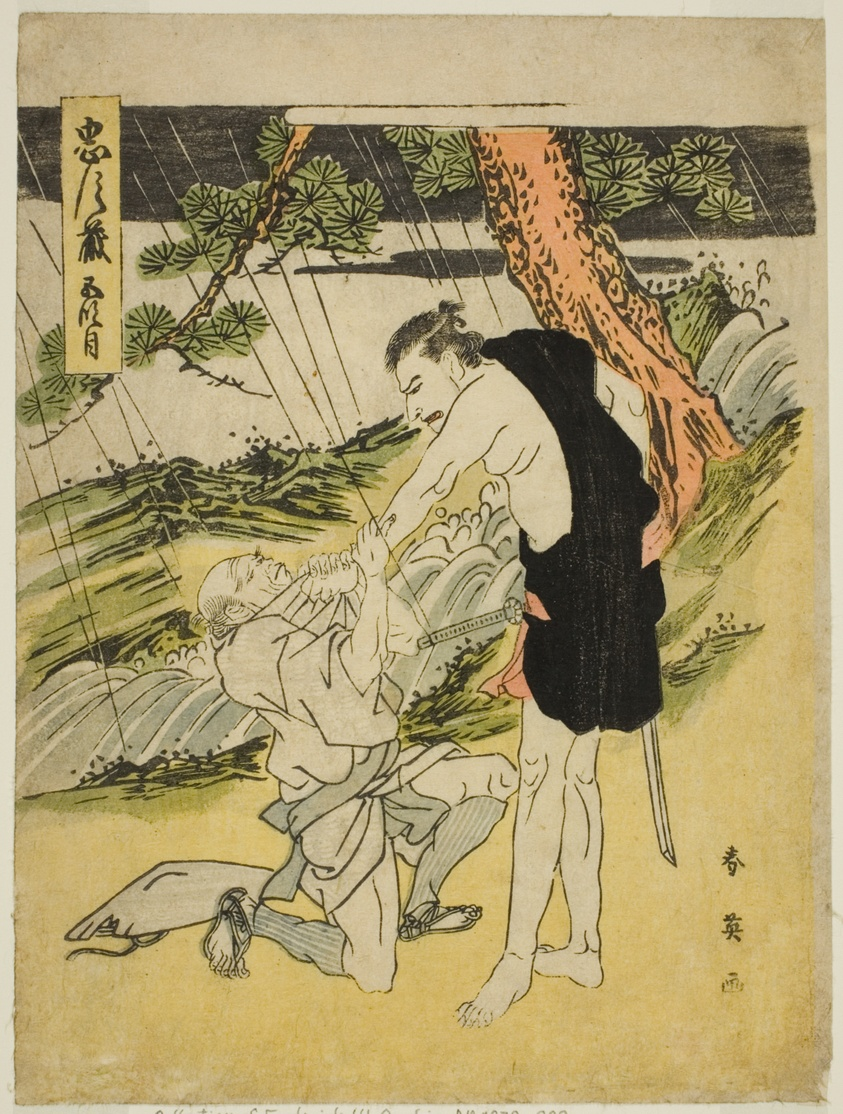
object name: Print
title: Act Five: Yamazaki Highway from the play Chushingura (Treasury of the Forty-seven Loyal Retainers)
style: Japanese (culture or style)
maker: Katsukawa Shun'ei; Japanese, 1762-1819; Yoichibei; Japanese, Unknown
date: c. 1795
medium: Color woodblock print; koban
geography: Japan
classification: woodblock print; print; asian art